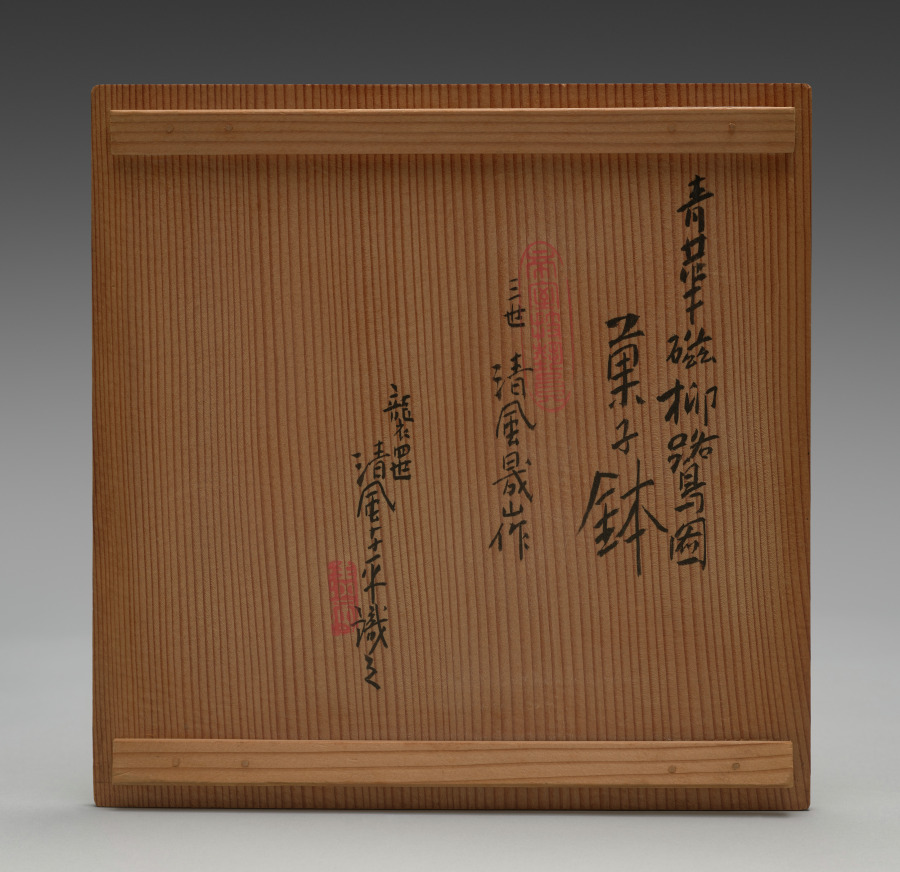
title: Sweets Bowl with Egrets and Willow in Snow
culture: Japan, Meiji period (1868–1912)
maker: Seifū Yohei III (Japanese, 1851–1914)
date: 1912–14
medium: Porcelain with underglaze blue and iron oxide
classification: Ceramic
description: For this sweets bowl, Yohei III designed a dramatic surround of egrets in a willow tree under heavy snow. The entire design is painted in cobalt blue under the transparent glaze. If one turns the bowl clockwise, two egrets come into view, one after the other. As they ascend, both struggle against the wind amid snow-laden weeping willow branches. They are followed by a stretch of willow branches that evoke the bitter cold. The sky is painted with blue washes all around the designs. The imagery culminates in a group of three egrets huddled together in the crotch of the tree. Of course, it is also possible to read the scene in the other direction, in which case the sheltering egrets look toward one of the flying egrets, who looks back at them, and it is the egret with wings outspread, looking directly down, who concludes the scene. Two thin bands of blue set off the design just under the bowl’s rim, and a band of brown iron oxide runs along the rim. Another two bands of blue run around the middle of the foot. The inside of the bowl’s box lid has an attestation by Yohei IV that it is the work of Yohei III.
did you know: This sweets bowl requires someone to rotate it to experience the birds observing one another.